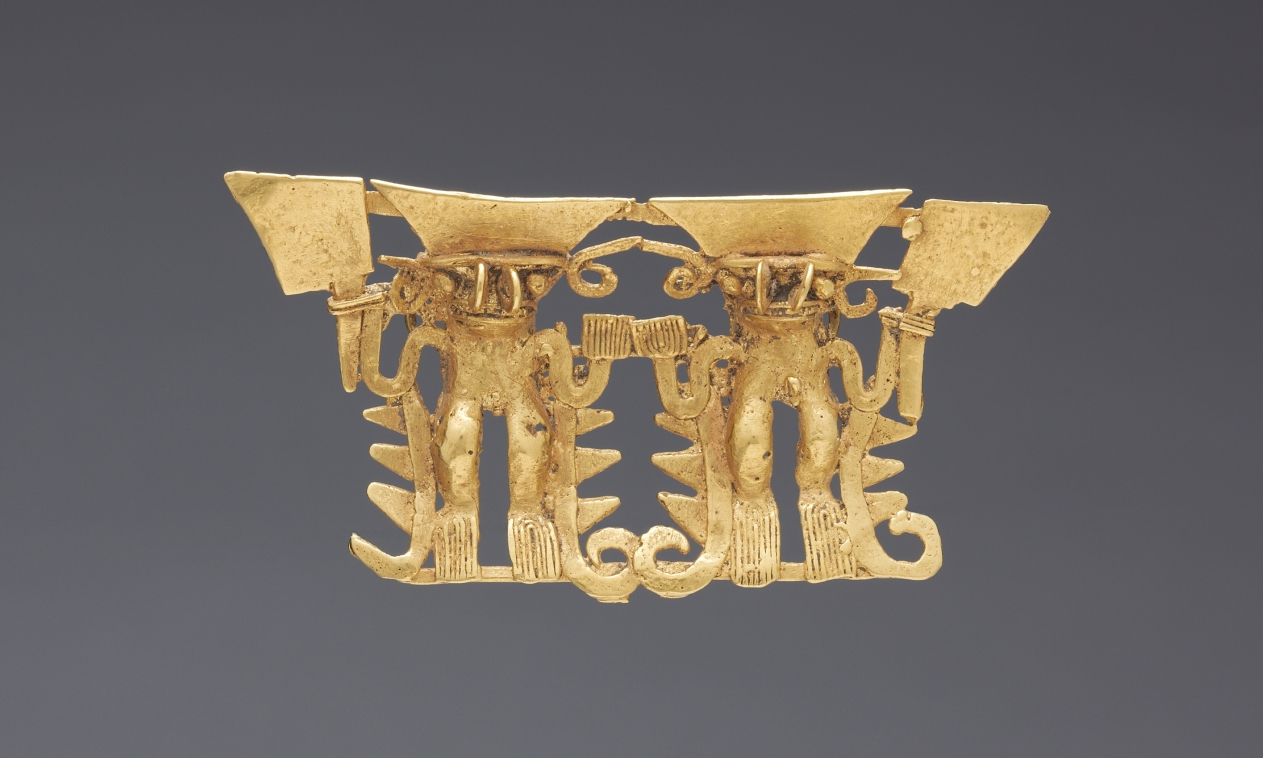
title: Bat-Nosed Figures Pendant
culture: Panama, Azuero Peninsula, Parita style, 11th-16th century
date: 1000–1550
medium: cast gold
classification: Metalwork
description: Both pendants depict paired figures with tusklike noses. The "tusks" perhaps refer to the upswept nose of the leaf-nosed bat, an agile hunter whose "leaf" helps it to snatch prey from midair. The bat's success as a hunter is part of the reason that some identify such paired figures as warriors. They each hold a paddle-shaped object; the larger pair, in elaborate costumes, also clutches staffs.